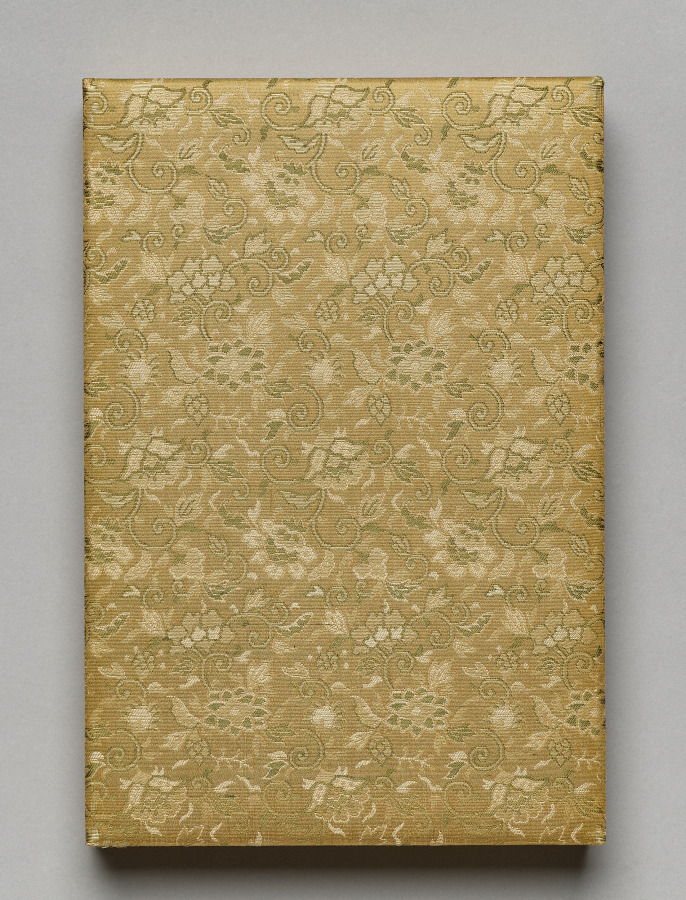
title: Flowers and Grasses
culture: Japan, Edo period (1615–1868)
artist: Tsubaki Chinzan (Japanese, 1801–1854)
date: 1841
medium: folding-album with six leaves of paintings; preface in ink on paper; paintings in ink and color on silk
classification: Bound Volume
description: This album contains six small paintings, each of which takes a different plant as its subject. The paintings include depictions of pomegranates, as well as flowering narcissus and orchid.